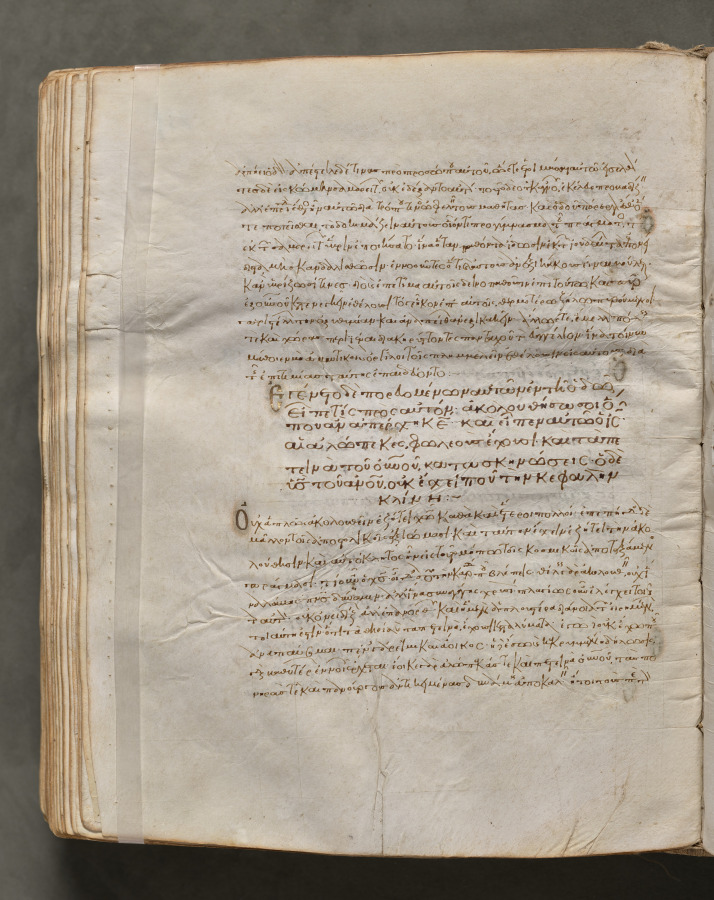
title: Text, folio 251 (verso), from a Gospel Book with Commentaries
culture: Byzantium, Constantinople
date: c. 1000–1100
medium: ink, tempera, and gold on vellum; leather binding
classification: Bound Volume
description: Each of the four gospels in this book opens on a page with brilliantly illuminated borders depicting the author of the text as well as birds—principally peacocks, symbols of the immortality of the soul—and fountains, representing the fountain of life and the salvation of the soul. This volume consists of 428 leaves with texts in Greek. Its level of sophistication suggests that it was probably written and decorated in a monastery in Constantinople.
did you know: Gospel books were carried in procession through Byzantine churches.